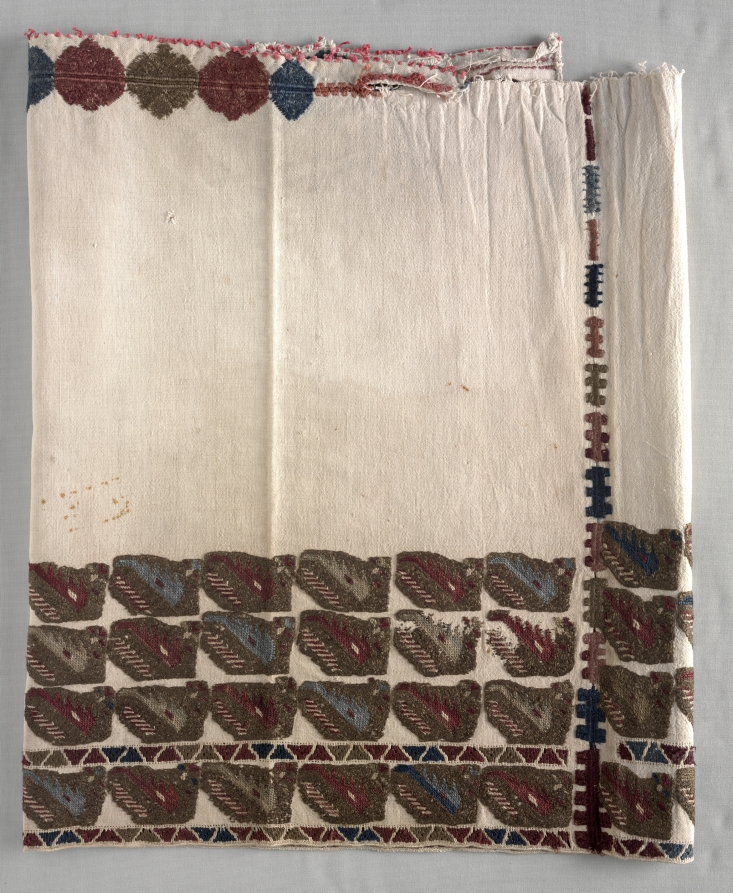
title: Sleeve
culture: Greece, Dodecanese Islands, 18th century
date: 1700s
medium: embroidery: silk on cotton tabby ground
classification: Embroidery